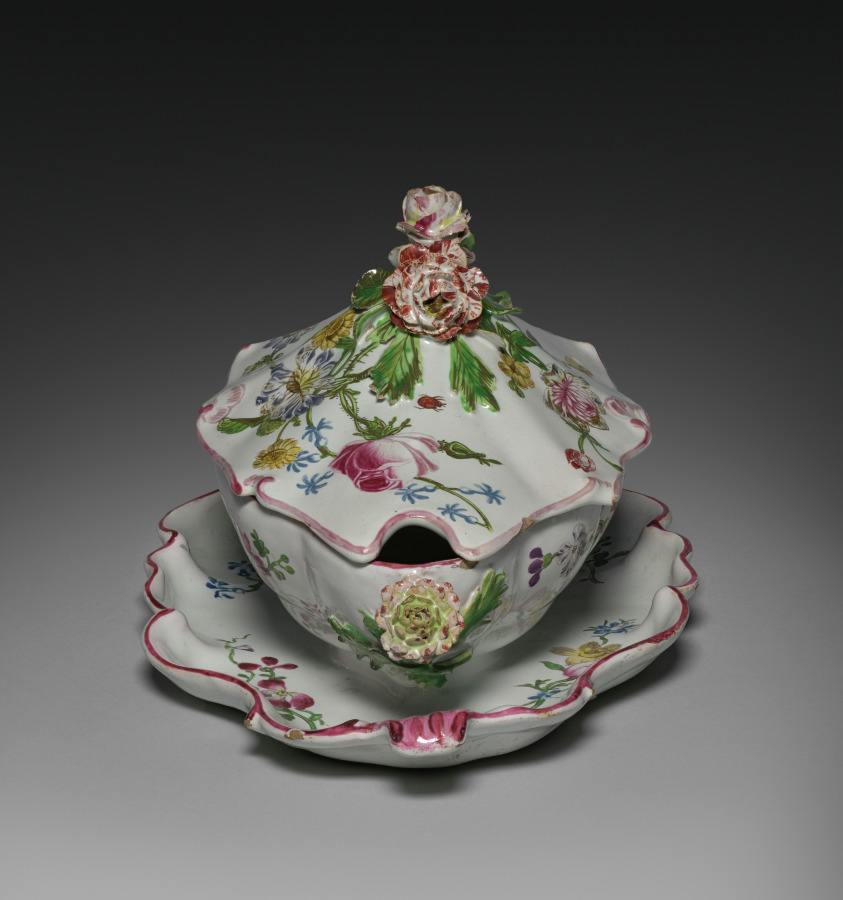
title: Covered Sauce Tureen with Attached Stand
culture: France, Marseilles, 18th century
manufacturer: Veuve Perrin Factory (French)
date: c. 1765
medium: tin-glazed earthenware (faience) with enamel decoration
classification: Ceramic